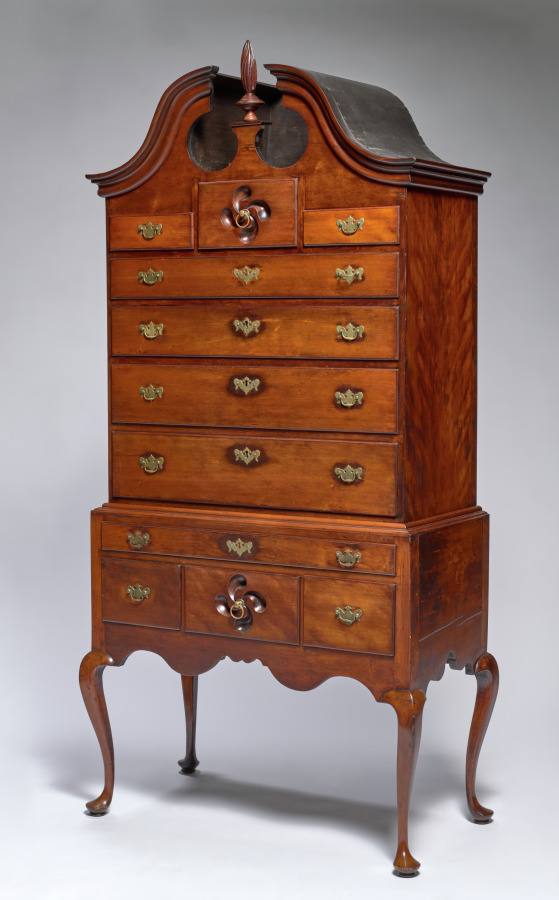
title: High Chest of Drawers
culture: America, Connecticut, 18th century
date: c. 1770–1785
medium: cherry and pine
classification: Furniture and woodwork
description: The style of this chest, generally termed Queen Anne, was introduced into American furniture from England in the first half of the 18th century. Connecticut, however, was a bit behind the times, so this gracefully designed piece was probably made at the time of the Revolution, or slightly later. The chest also features some technical details typical of furniture from this region. It is made of cherry wood that was stained dark. Its surface was also patterned to look like the wood graining of mahogany, the expensive tropical wood that was used when pieces such as this were made in metropolitan centers like Boston or New York.